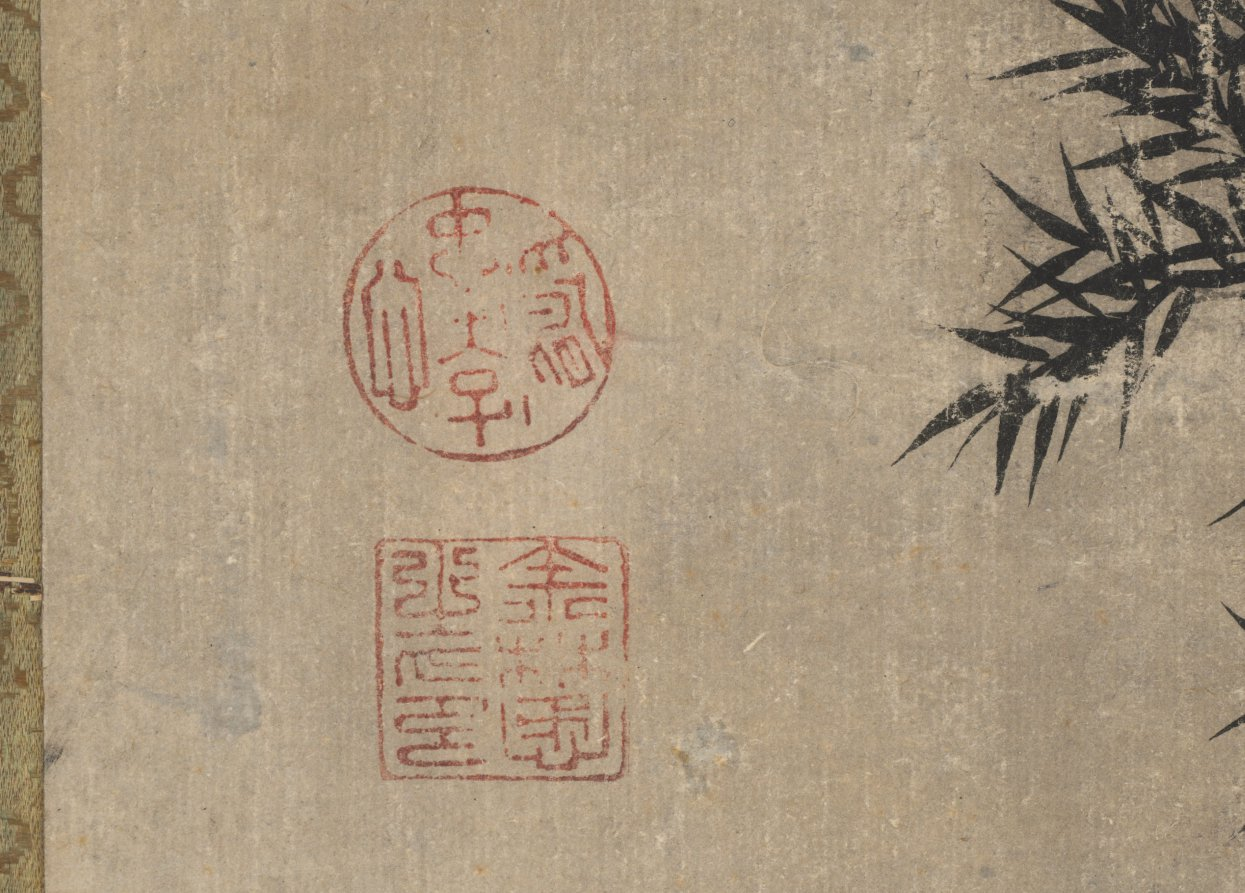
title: Bamboo in Moonlight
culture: Korea, Joseon dynasty (1392–1910)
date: 1500s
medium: hanging scroll; ink on paper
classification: Painting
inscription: two seals of artist (?) at upper left side.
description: This painting depicts the full moon shining through a stand of bamboo, and for Joseon literati it would have conveyed the sense of life in harmony with nature to which they aspired. As one of the "four gentlemen" along with plum trees, orchids, and chrysanthemums, bamboo, which has immense flexibility, allowing it bent to extremes without breaking—symbolize a gentleman's noble virtue. Here, the painter depicted the shining moon rising above a bamboo tree to create a meditative nightly scene.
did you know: This painting is currently in the Korean art collection, but some stylistic features suggest that it may be Japanese.